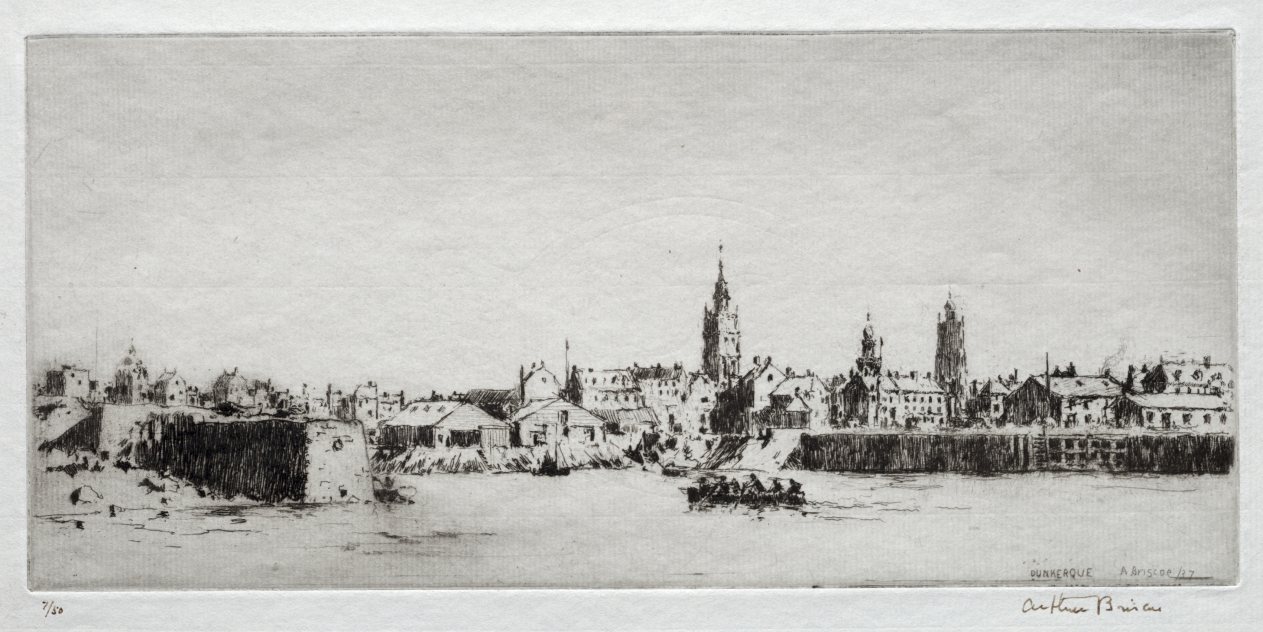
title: Dunkerque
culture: England, 20th century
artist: Arthur John Trevor Briscoe (British, 1873–1943)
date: 1937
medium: etching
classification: Print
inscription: Lower margin, in brown ink: 7/50 Arthur Briscoe